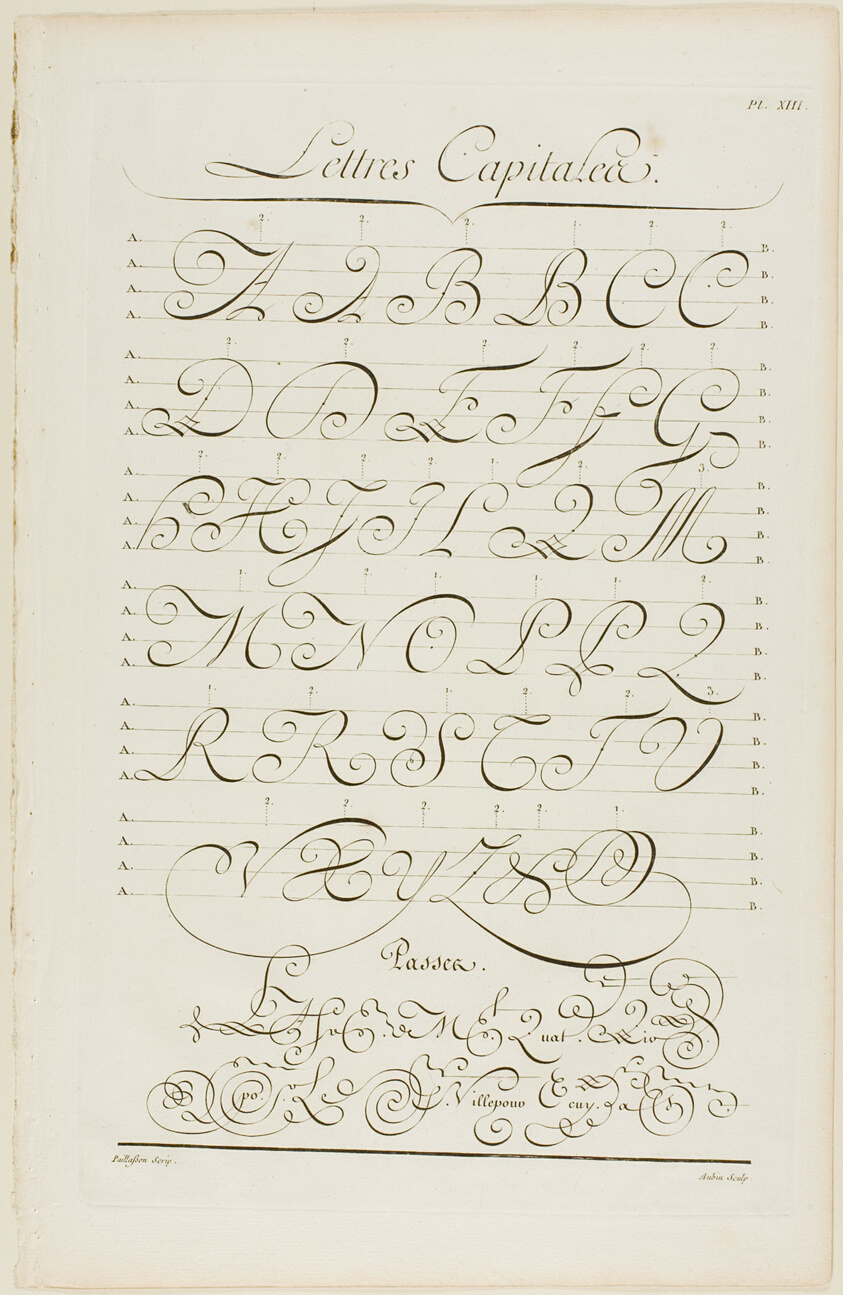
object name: Print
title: Capital Letters, from Encyclopédie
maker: Aubin (French, active 18th century); after Charles Paillasson (French, 1718-1789); published by André le Breton (French, 1708-1779), Michel-Antoine David (French, c. 1707-1769), Laurent Durand (French, 1712-1763), and Antoine-Claude Briasson (French, 1700-1775)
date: 1760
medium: Engraving on cream laid paper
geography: France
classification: engraving; print; prints and drawing